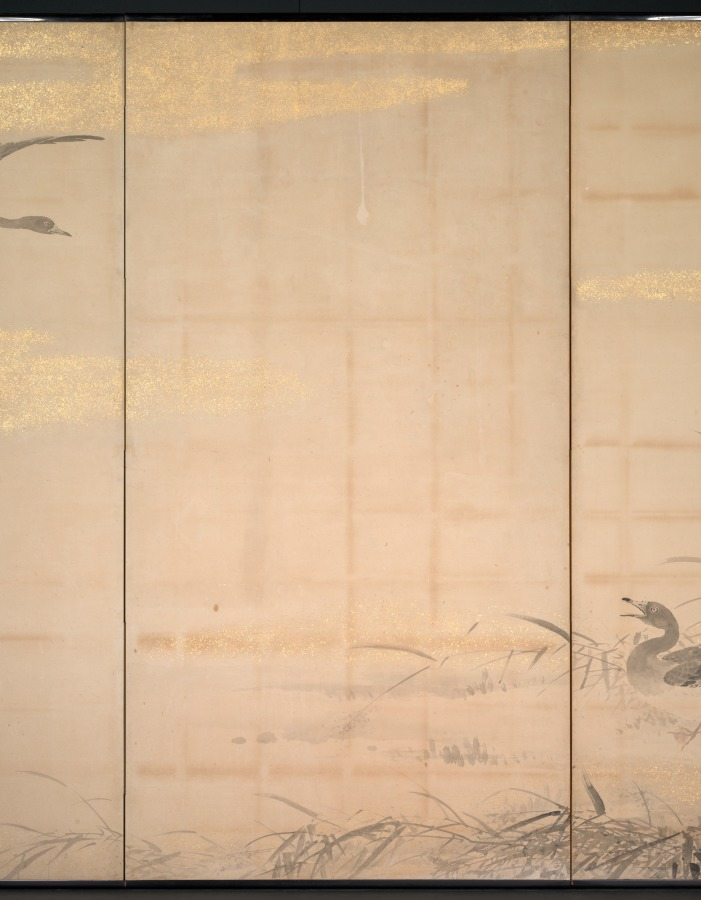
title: Geese, Reeds, and Water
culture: Japan, Edo period (1615–1868)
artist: Yamamoto Baiitsu (Japanese, 1783–1856)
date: 1800s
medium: One of a pair of four-panel folding screens; ink, color, and cut gold foil on paper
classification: Painting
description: This byōbu composition differs from most in that it comprises two four-panel screens, rather than two six-panel units. Since the current mounting is modern, it is impossible to determine whether its present configuration represents its original design. Some panels may have been removed to help the screens better fit into a modern interior space. Baiitsu worked almost exclusively in monochromatic ink tones and favored classical Chinese painting themes.